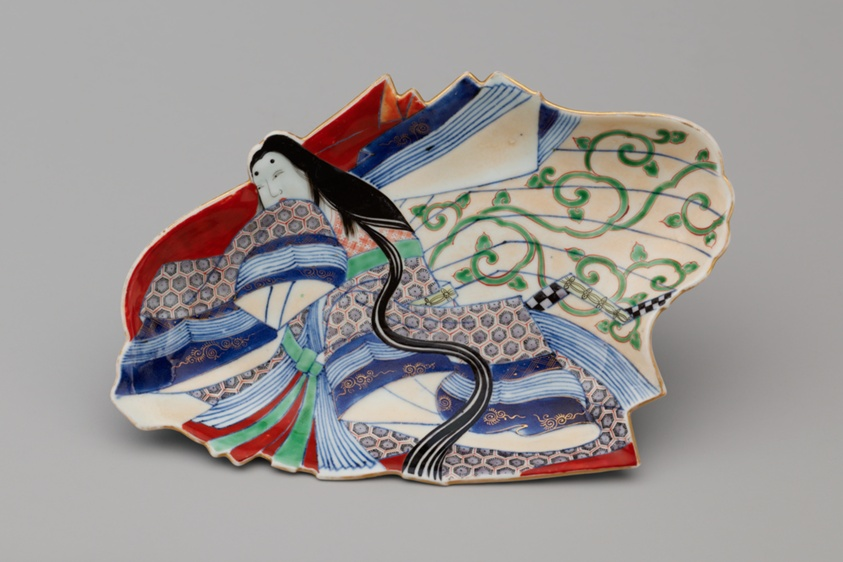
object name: Vessel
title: Dish with Design of a Court Woman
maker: Japan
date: 18th century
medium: Porcelain with colored enamels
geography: Japan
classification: porcelain; asian art; ceramics; decorative arts